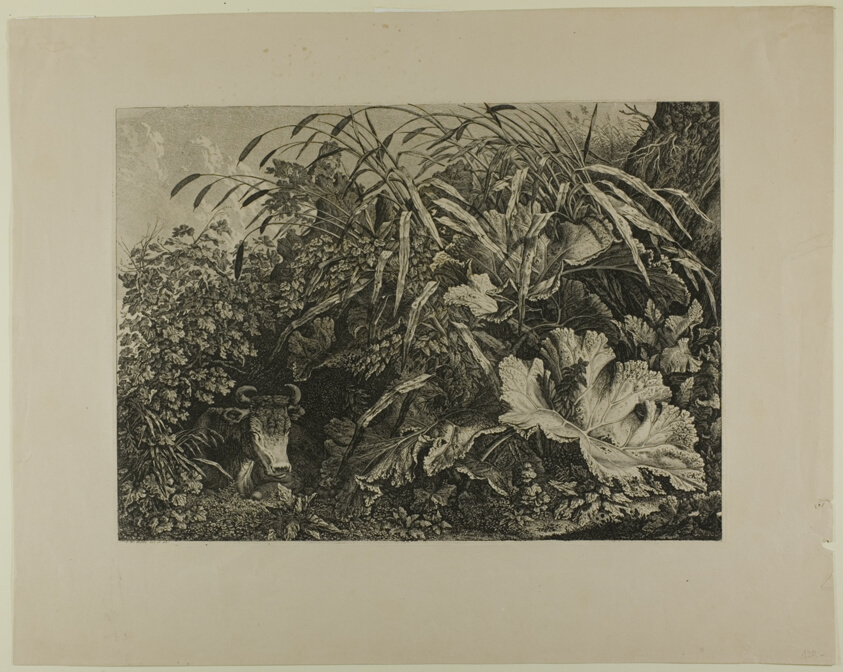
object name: Print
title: Cow Standing in a Swamp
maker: Carl Wilhelm Kolbe, the elder (German, 1759-1835)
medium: Etching on paper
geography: Germany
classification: etching; print; prints and drawing